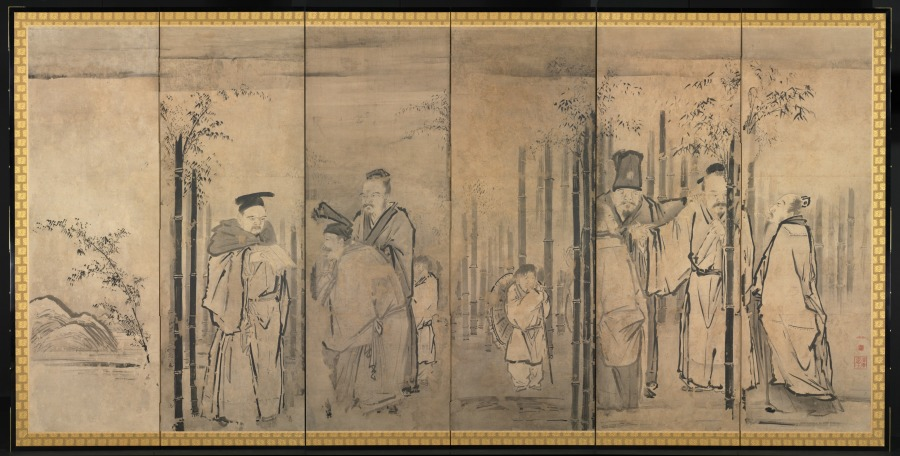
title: Seven Sages of the Bamboo Grove; Four Elders of Mt. Shang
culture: Japan, Edo period (1615–1868)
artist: Kano Tan’yū (Japanese, 1602–1674)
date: 1600s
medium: pair of six-fold screens; ink on paper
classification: Painting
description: The Kano school was a group of professional artists patronized by the shogun from the late Muromachi period to the Edo period. The group adopted themes of reclusiveness to convey the importance of loyalty to the shogunate. A leader of the Edo Kano school, Kano Tanyu paired Seven Sages of the Bamboo Grove and Four Elders of Mt. Shang to reference a painting of the same theme attributed to Kano Motonobu. Seven Sages of the Bamboo Grove refers to the elites who escaped the social chaos of China’s Wei-Jin period (AD 200s–400s); they fled to a secluded bamboo grove where they could express themselves freely, enjoying pure conversation, music, and wine. Four Elders of Mt. Shang depicts the scholars who left the turbulence of the late Qin dynasty to pursue their scholarly interests in seclusion on Mt. Shang in Shanxi province.